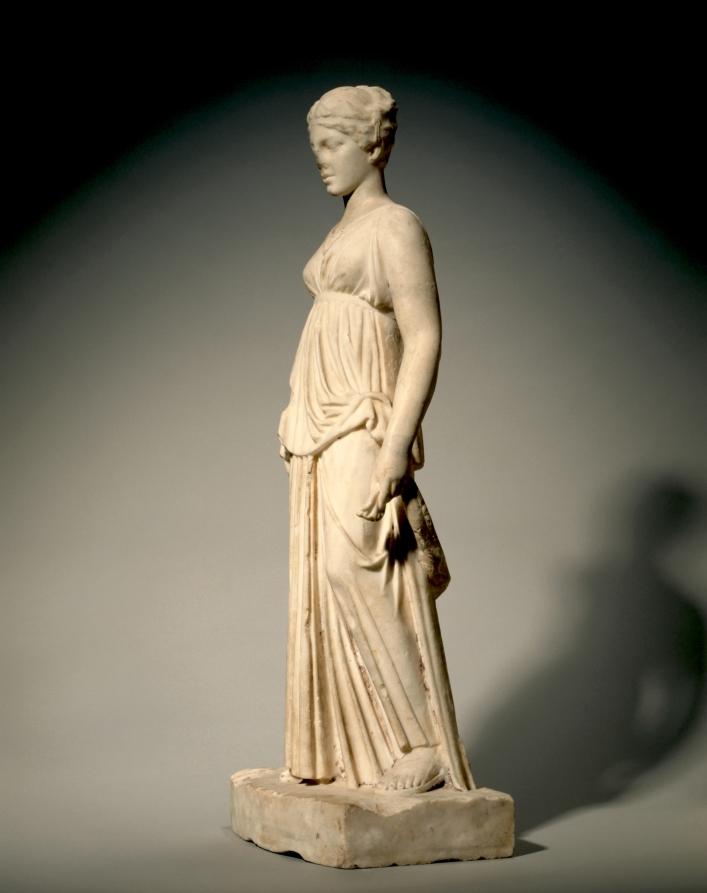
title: Dancer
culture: Greece, Alexandria(?)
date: c. 50 BCE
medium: marble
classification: Sculpture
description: The pose and dress of this statuette of a woman, together with her elaborate sandals and hairstyle, suggest that she represents a dancer. Standing with one knee slightly bent, she holds a sash in her lowered left hand. The sash passes behind her back, probably to be held aloft in her right hand, now separated. She wears a chiton, a rectangular sheet folded at the top to create a large overhang, then wrapped around the left side of the body and pinned at the shoulders. Belted high above her waist, the fabric cascades in deep folds.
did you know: Three nonjoining fragments, including a right hand and arm, may belong to this statuette.